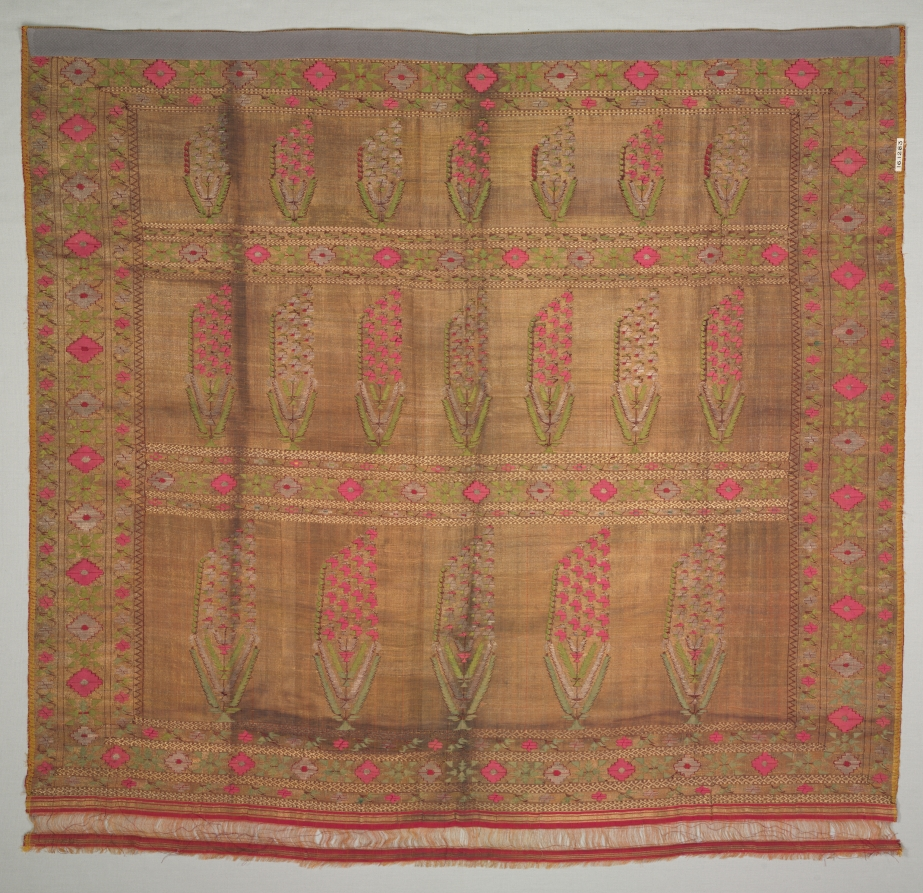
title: Fragment of a Sari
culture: India, Aurangabad ?, 18th-19th century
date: 1700s - 1800s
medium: brocade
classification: Textile